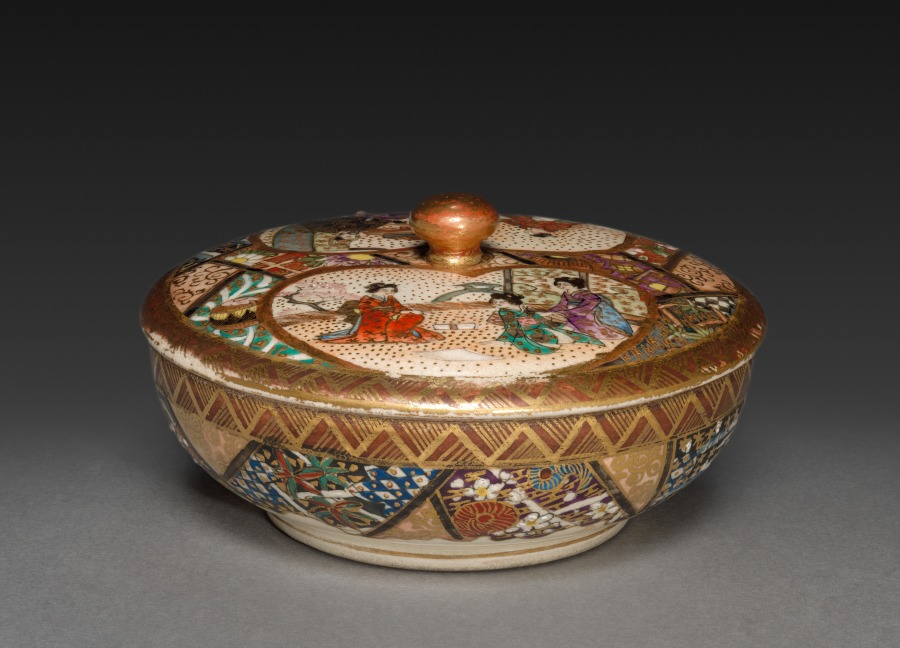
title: Covered Dish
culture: Japan, Meiji period (1868–1912)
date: early 1900s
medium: porcelain with overglaze color enamel and gold (Satsuma ware)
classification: Ceramic